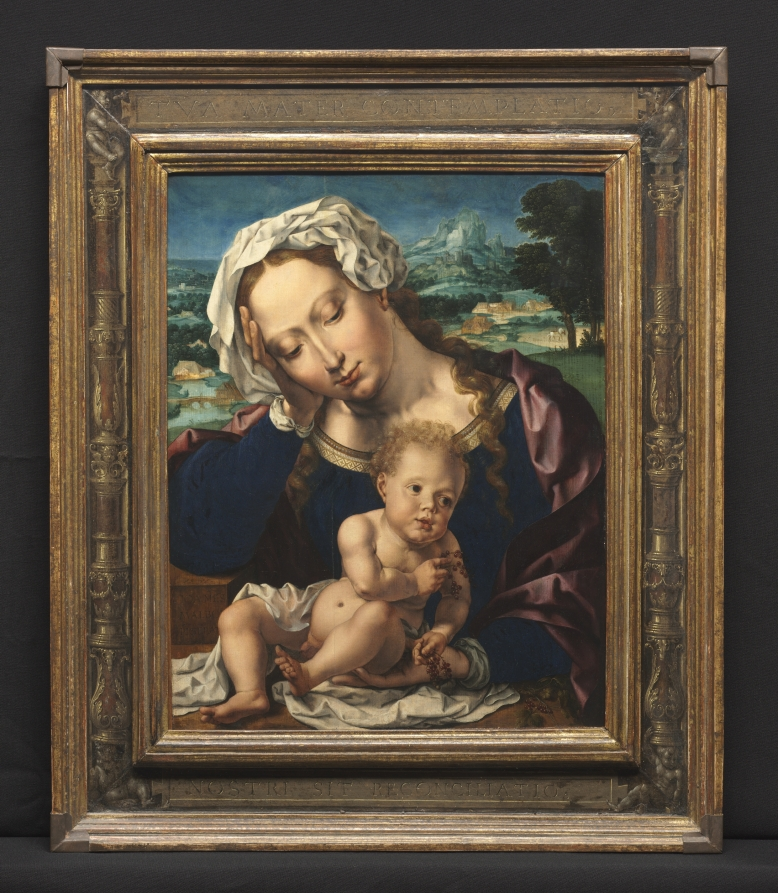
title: Virgin and Child in a Landscape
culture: Flanders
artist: Jan Gossaert (Flemish, c. 1475/78–1532)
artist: and an Anonymous Landscape Painter (Flemish)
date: 1531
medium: oil on wood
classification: Painting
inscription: Signed lower left: "1531 / JOANES / MALBO [...] / PÏGEBAT"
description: Among the first northern European artists to study in Rome, Gossaert returned north to serve in various German and Flemish courts, incorporating Italian Renaissance ideas. Gossaert also painted the frame, including the Latin inscription: "Mother, may your contemplation be our reconciliation." The patron is likely Mencía de Mendoza, a Spanish noblewoman, one of the most important art collectors and intellectuals of the early 1500s.